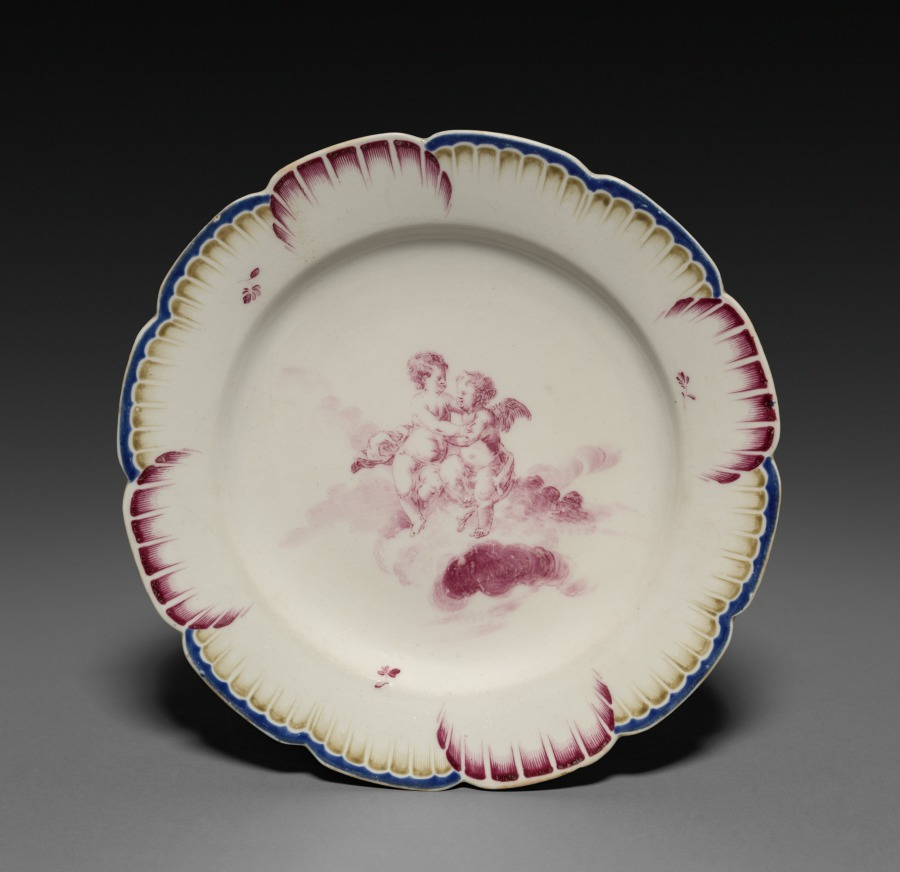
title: Plate (Assiette)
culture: France, 18th century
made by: Sceaux Factory (French, active 1748–66)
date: c. 1775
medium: soft-paste porcelain with enamel decoration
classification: Ceramic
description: In an effort to remain competitive in the porcelain market, European porcelain factories borrowed motifs, designs, and techniques from one another. Though this plate was produced at the Sceaux porcelain factory, its painting of two putti lounging on a bank of clouds likely took inspiration from the work of François Boucher, who worked at the Vincennes-Sèvres factory in the mid-1700s.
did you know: This plate is painted en camaïeu, a technique popular in 18th-century porcelain in which several tints of a single color are used to create a monochromatic image.